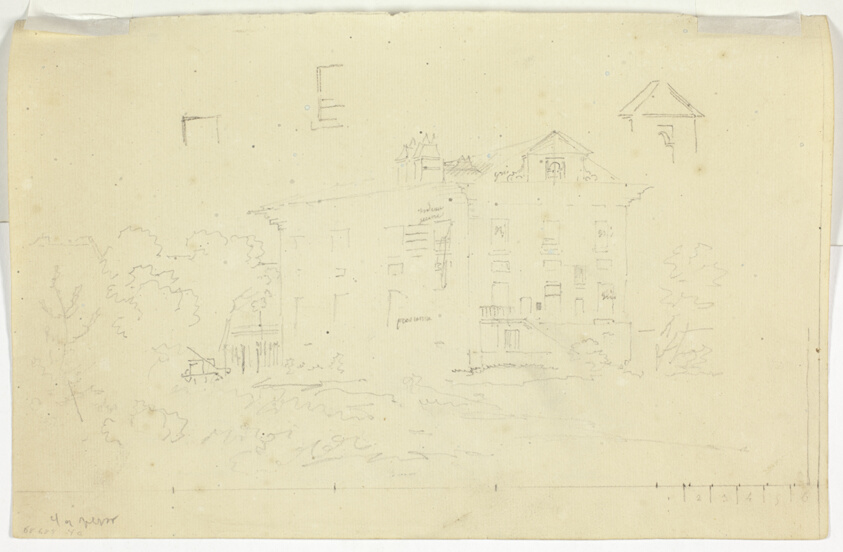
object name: Drawing and Watercolor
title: A House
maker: Pierre Antoine Mongin (French, 1761-1827)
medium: Black chalk and graphite on cream laid paper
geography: France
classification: drawings (visual works); prints and drawing